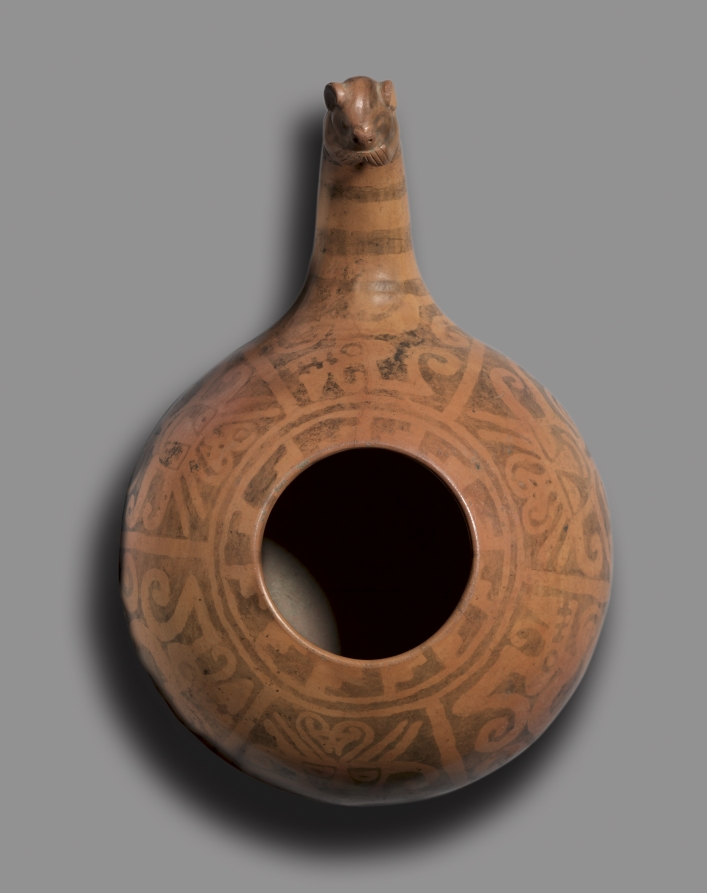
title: Dipper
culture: Peru, North Highlands, Recuay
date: 100 BCE–700 CE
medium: ceramic, slip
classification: Ceramic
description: Both of these objects feature a creature known as the "Recuay feline," although it could also refer to a fox, dog, or viscacha (a rodent). Whatever its identity, the prominent crest on its head ties it to the supernatural realm, a connection underlined by the deity head that also appears on the dipper and by the ritual function of snuff tablets, which were used to inhale hallucinogenic snuffs during religious ceremonies.